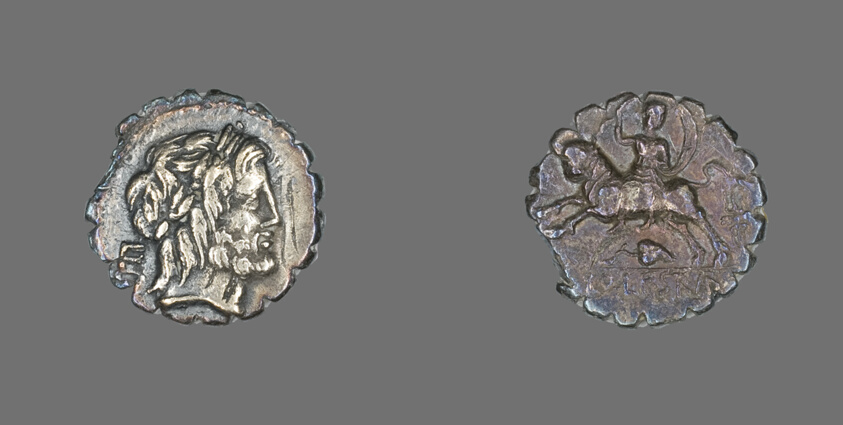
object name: Coin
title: Denarius Serratus (Coin) Depicting the God Jupiter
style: roman (ancient, style or period), ancient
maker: Roman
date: about 81 BCE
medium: Silver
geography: Roman Empire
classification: coin; ancient art